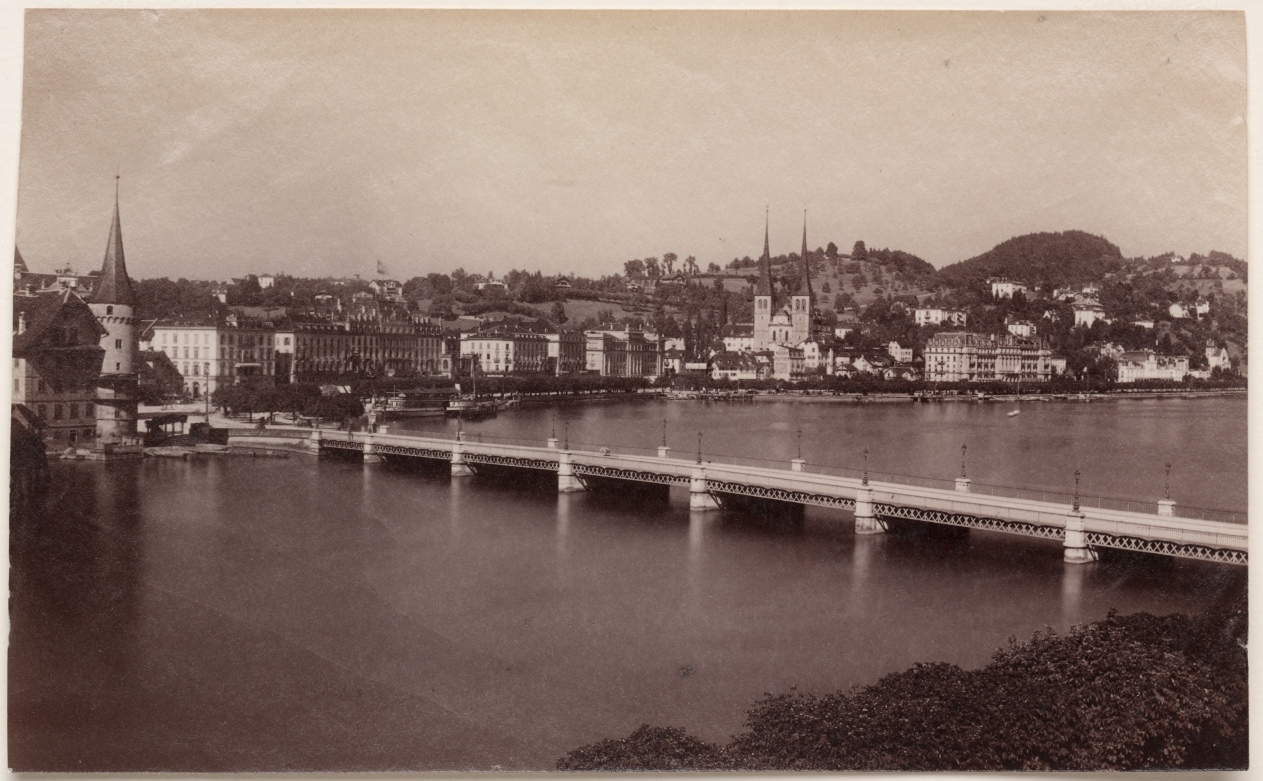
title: Untitled (Bridge with Town in Distance)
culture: 19th century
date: 1900s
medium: albumen print from wet collodion negative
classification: Photograph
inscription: written in pencil on verso: "477 (?)="